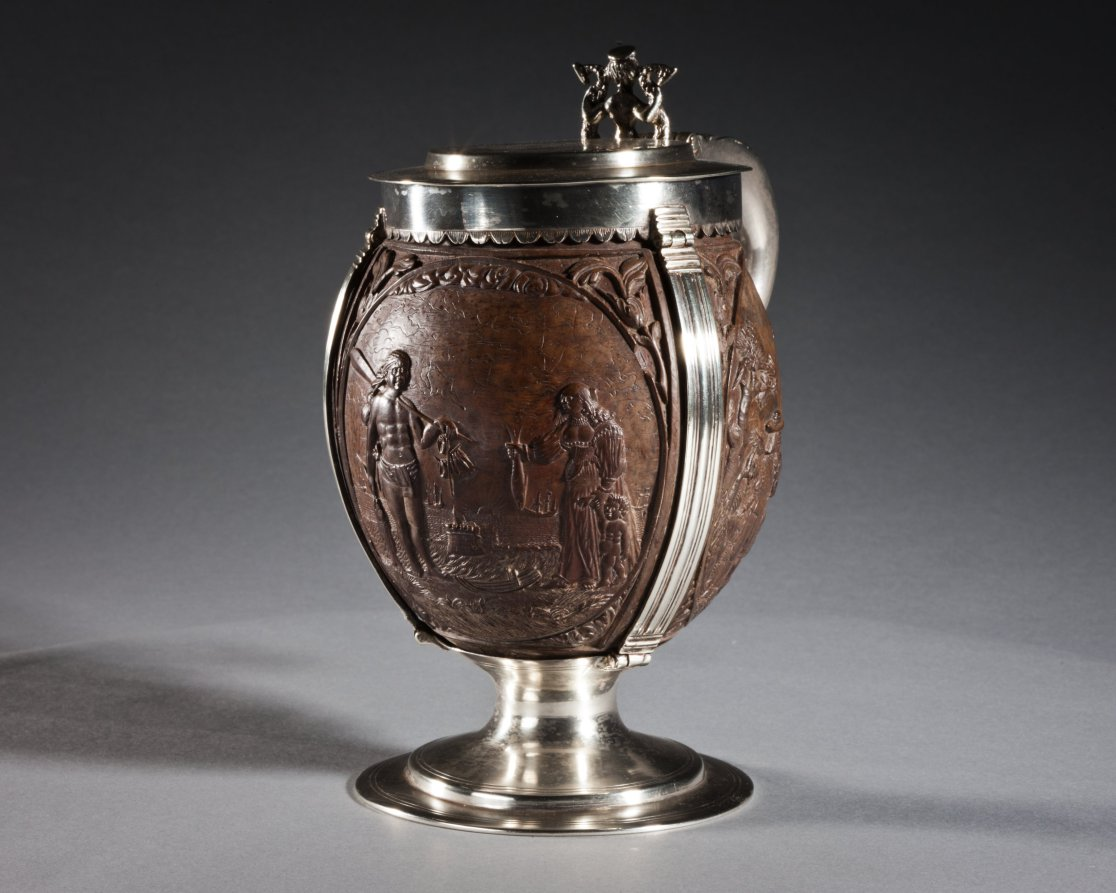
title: Coconut Cup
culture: carved coconut, probably The Netherlands; silver mount, probably England, 17th century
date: c. 1630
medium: carved coconut in silver mount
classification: Metalwork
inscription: top lid has engraved coat-of-arms, underside of lid has inscription: George Lewis TIVERTON Feby, 1st 1760.